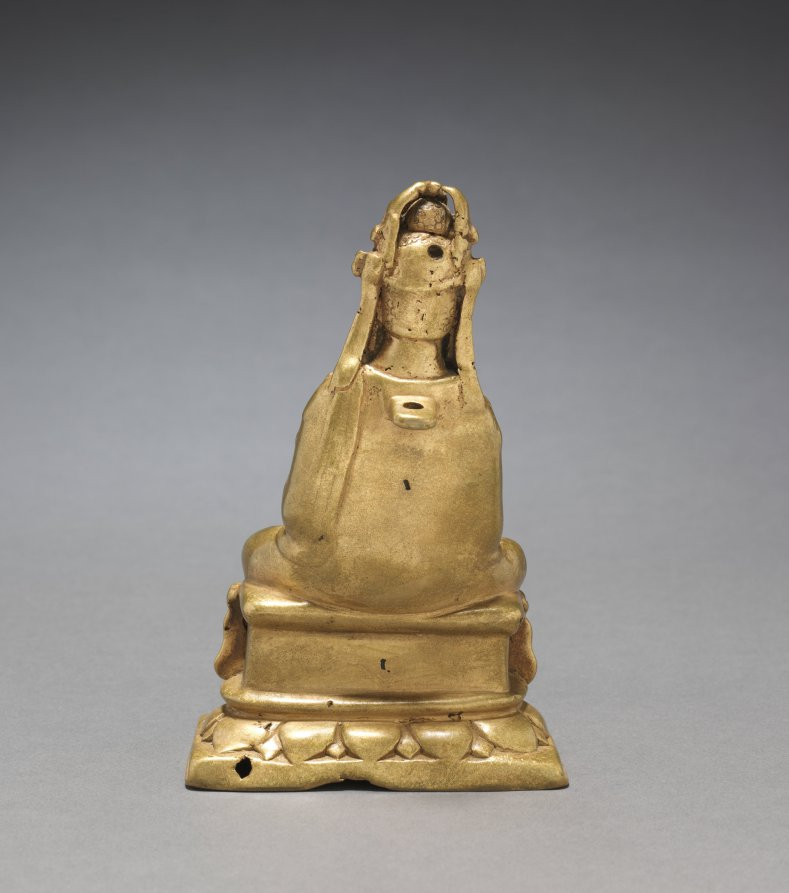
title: Crowned Buddha Seated on a Lion Throne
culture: India, Kashmir, 8th century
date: 700s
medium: brass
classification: Sculpture